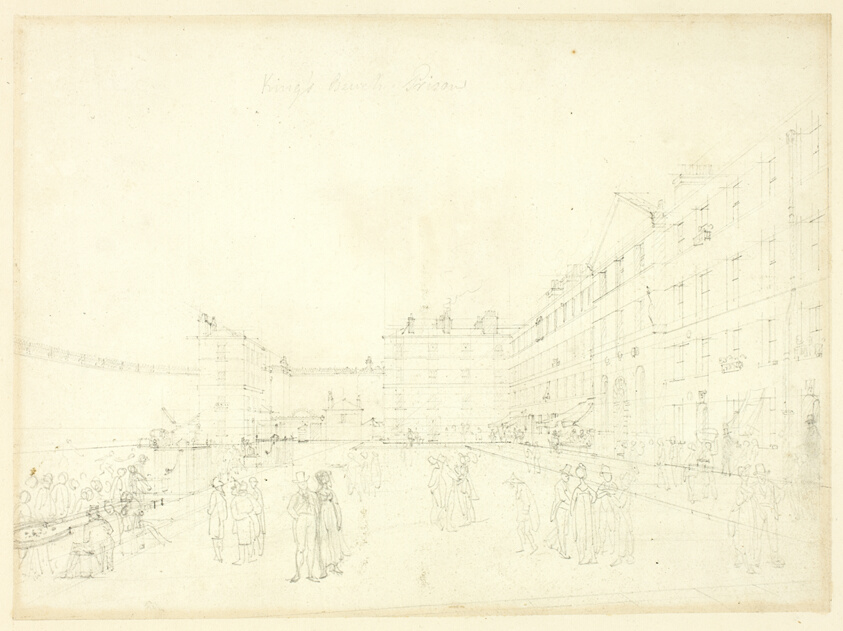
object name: Drawing and Watercolor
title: Study for King's Bench Prison, from Microcosm of London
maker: Augustus Charles Pugin (English, born France, 1762-1832); Thomas Rowlandson (English, 1756-1827)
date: c. 1808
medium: Graphite on cream wove paper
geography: England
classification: graphite; drawings (visual works); prints and drawing